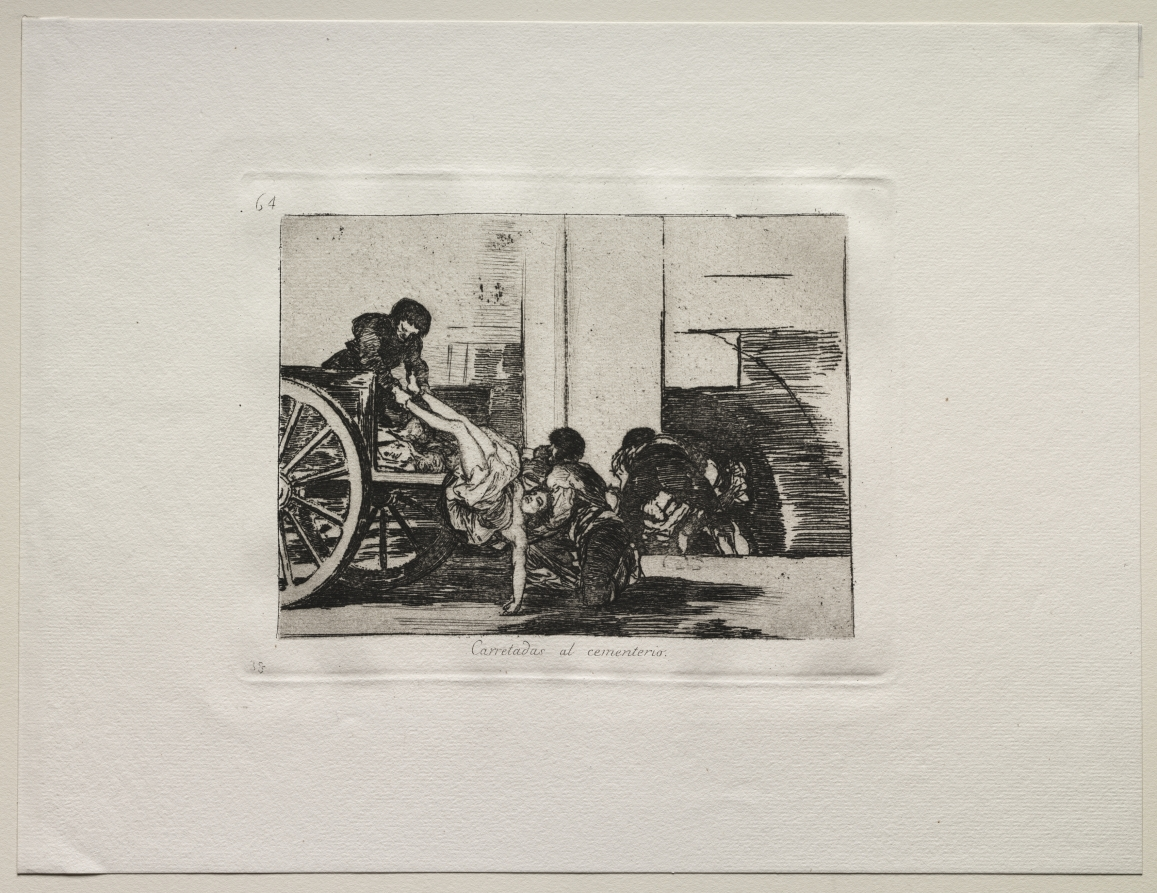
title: The Horrors of War: Cartloads to the Cemetery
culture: Spain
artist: Francisco de Goya (Spanish, 1746–1828)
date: c. 1810–20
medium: etching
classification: Print